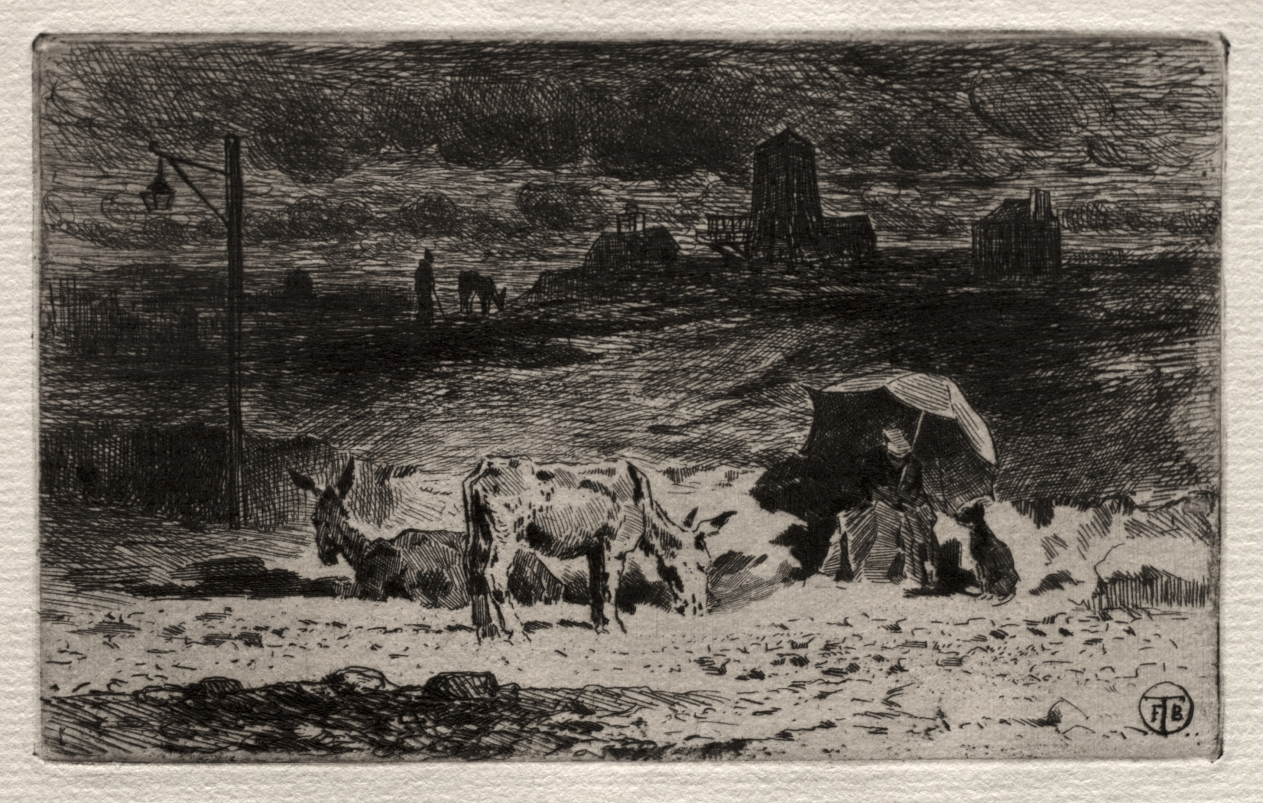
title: The Donkeys at the Hill of the Cailles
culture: France, 19th century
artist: Félix Hilaire Buhot (French, 1847–1898)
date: c. 1875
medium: etching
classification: Print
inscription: inscribed, lower left, in plate: [artist's monogram]